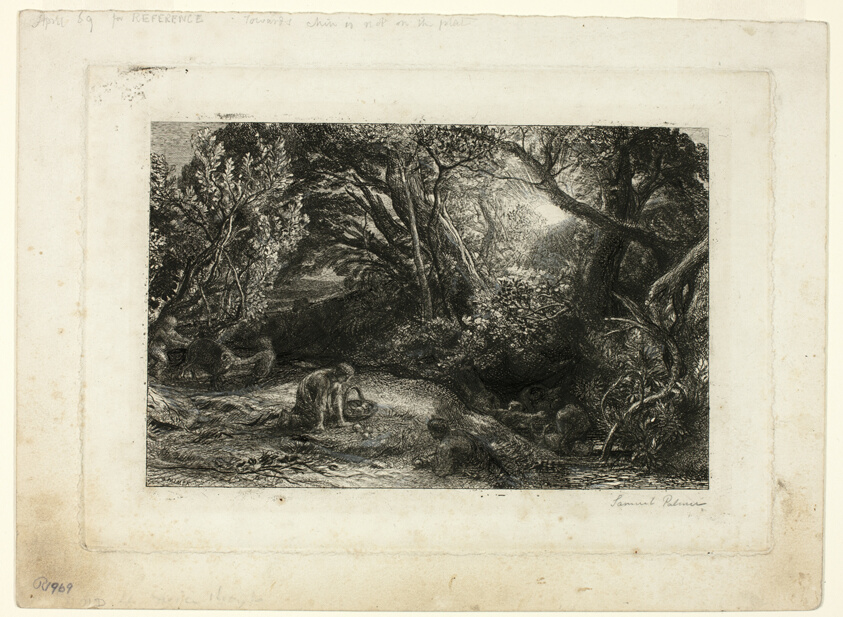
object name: Print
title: The Morning of Life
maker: Samuel Palmer (English, 1805-1881)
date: 1860/61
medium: Etching in black on paper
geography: England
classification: etching; print; prints and drawing